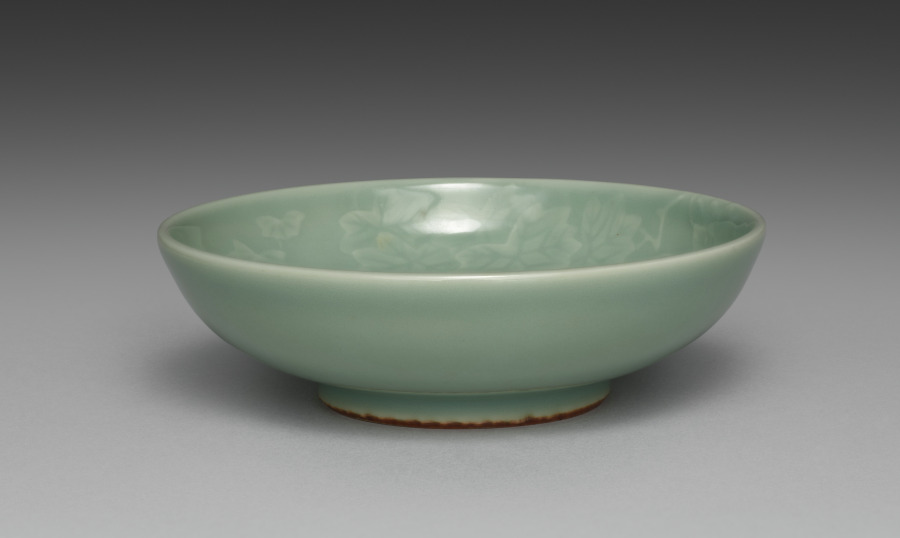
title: Dish from Dishes with Ivy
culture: Japan, Meiji period (1868–1912)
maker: Seifū Yohei III (Japanese, 1851–1914)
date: 1893–1914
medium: One from a set of five dishes; porcelain with green glaze and molded designs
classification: Ceramic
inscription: 清風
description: Yohei III’s main output for his sophisticated clientele was in the form of tea sets and dining sets. He often produced in pairs, sets of five, or sets of ten. This set of five dishes with a green glaze and designs of ivy vines in very low relief has unfortunately lost its box. These dishes are slightly larger than the other dishes, like CMA 2022.187, and so may have been not saucers but rather small plates for meals.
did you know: In his career, Seifū Yohei III created a range of dishes in green glazes.